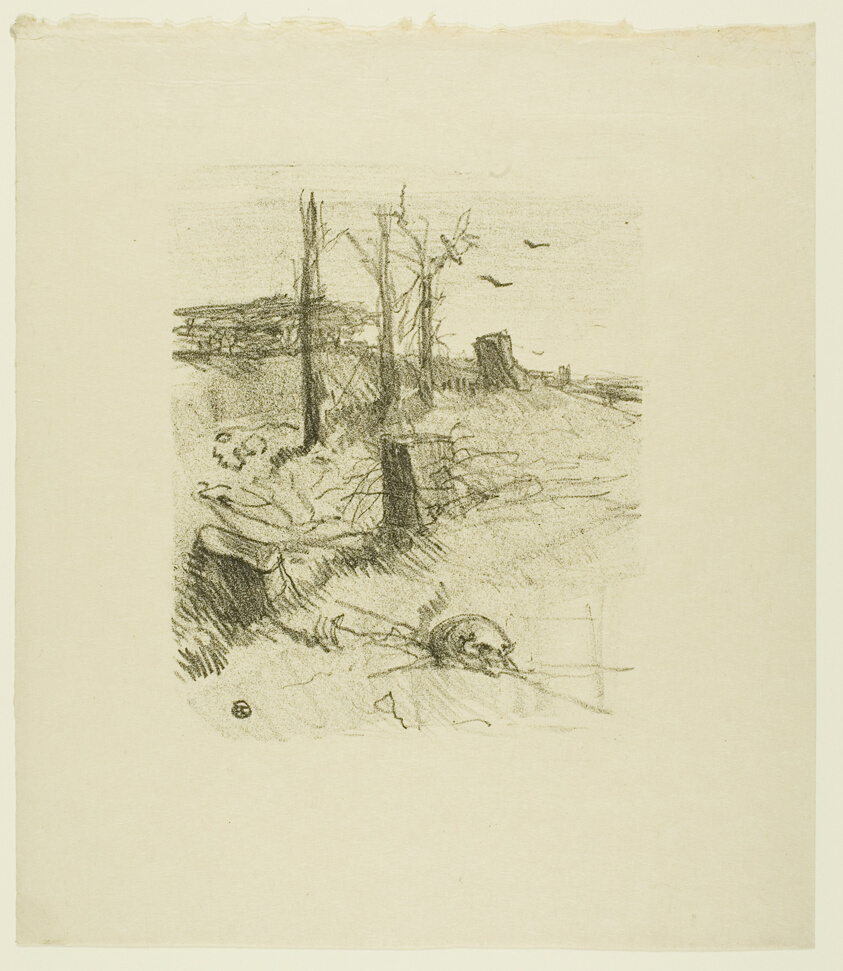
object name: Print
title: A Cemetery in Galicia, from Au Pied du Sinaï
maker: Henri de Toulouse-Lautrec (French, 1864-1901)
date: 1897, published 1898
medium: Lithograph on cream wove paper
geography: France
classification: lithograph; print; prints and drawing